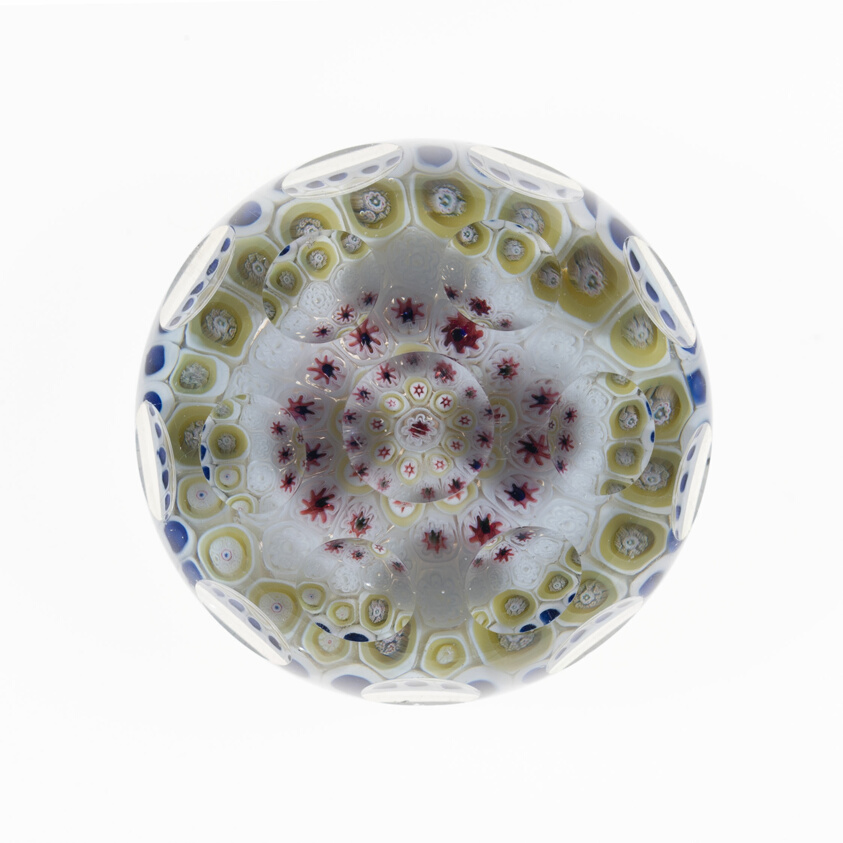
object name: Glass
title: Paperweight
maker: George Bacchus and Sons; Birmingham, England, c. 1817-1882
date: c. 1848–55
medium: Glass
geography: Birmingham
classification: paperweight; millefiori; european decorative arts; glass